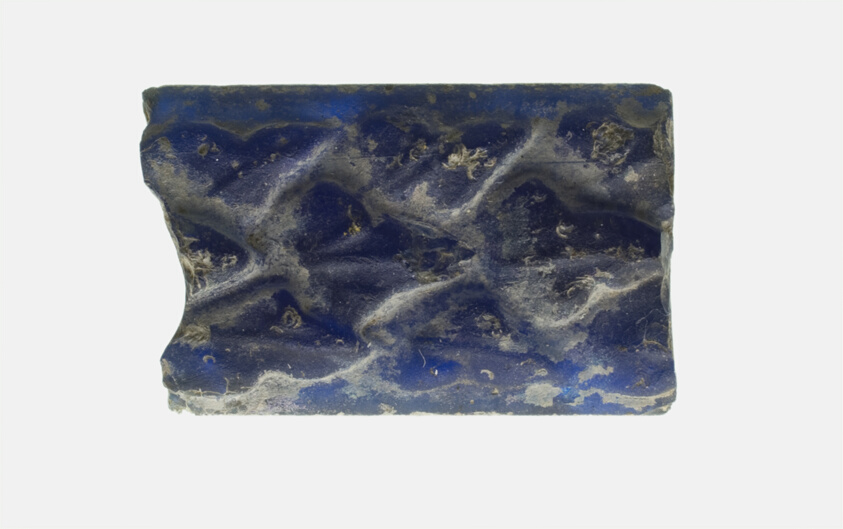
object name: Decorative Arts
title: Fragment of a Revetment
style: roman (ancient, style or period), ancient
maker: Roman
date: 1st century BCE–1st century CE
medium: Glass, cast technique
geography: Italy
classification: glass; inlay; ancient art; decorative arts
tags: decoration